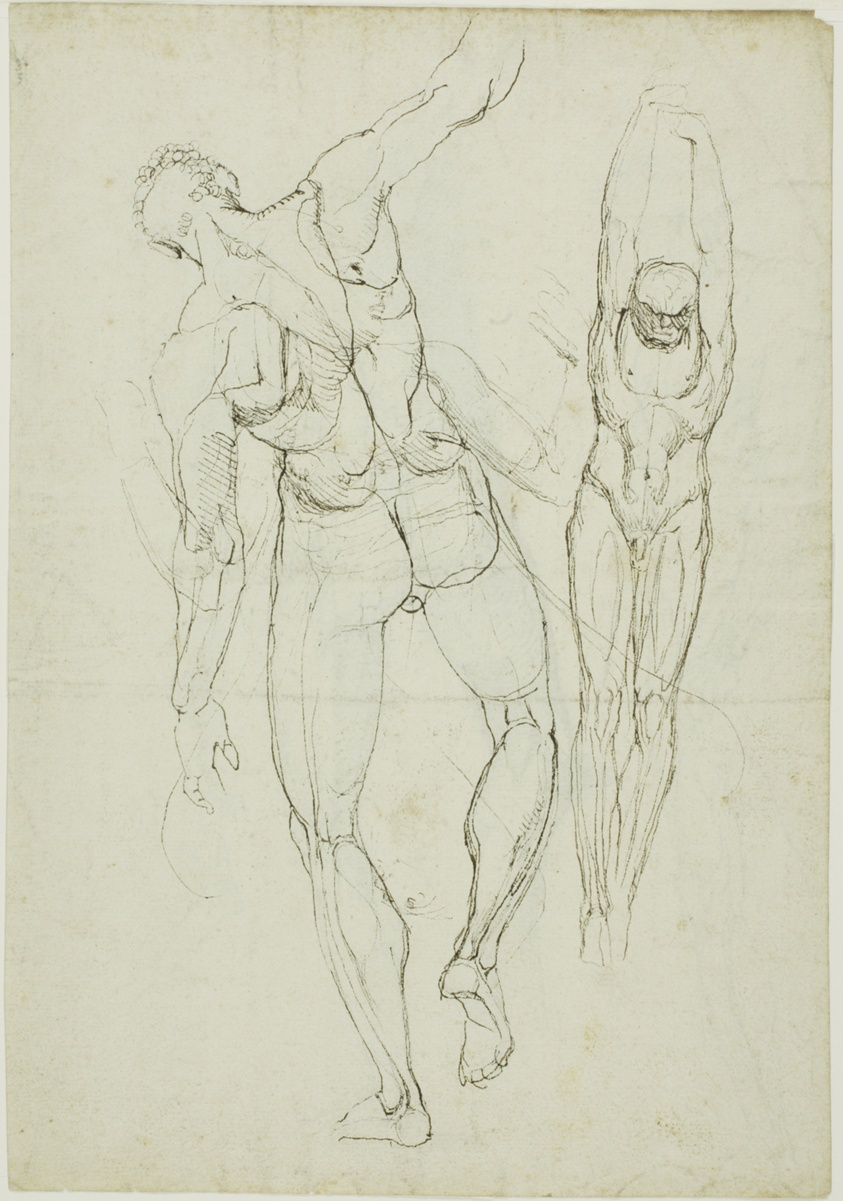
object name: Drawing and Watercolor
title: Figure Studies (recto and verso)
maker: Henry Fuseli (Swiss, active in England, 1741-1825)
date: c. 1800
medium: Pen and brown ink (recto and verso) on cream laid paper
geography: England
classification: pen and ink drawings; drawings (visual works); prints and drawing; paper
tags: zigzags